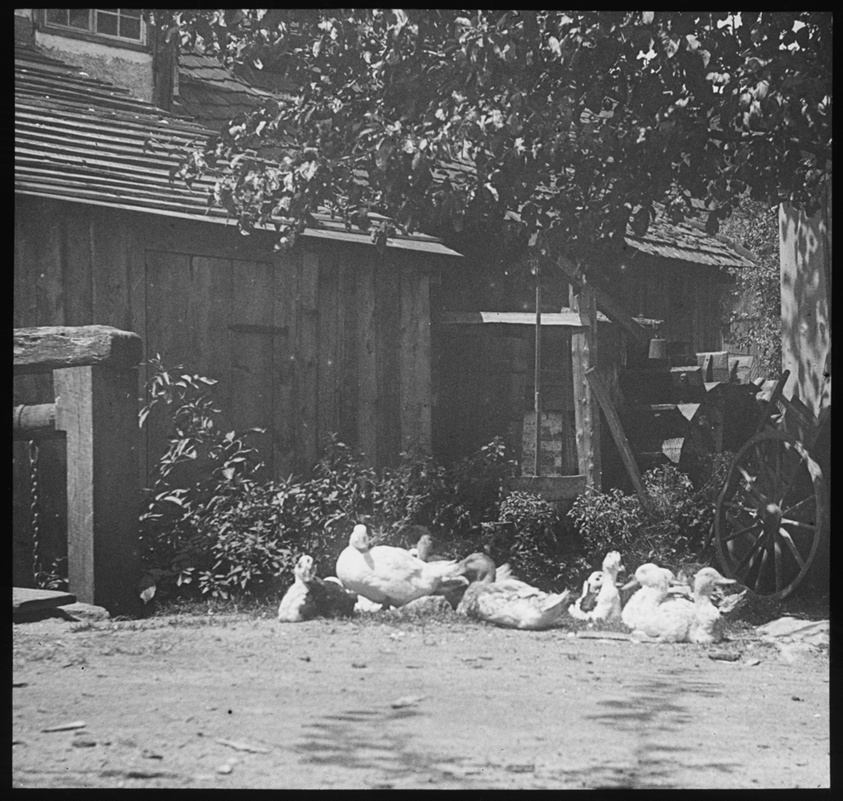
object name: Photograph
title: Gutach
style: 19th century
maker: Alfred Stieglitz (American, 1864–1946)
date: 1894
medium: Lantern slide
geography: United States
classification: lantern slide (glass); negative/transparency; photography; photograph